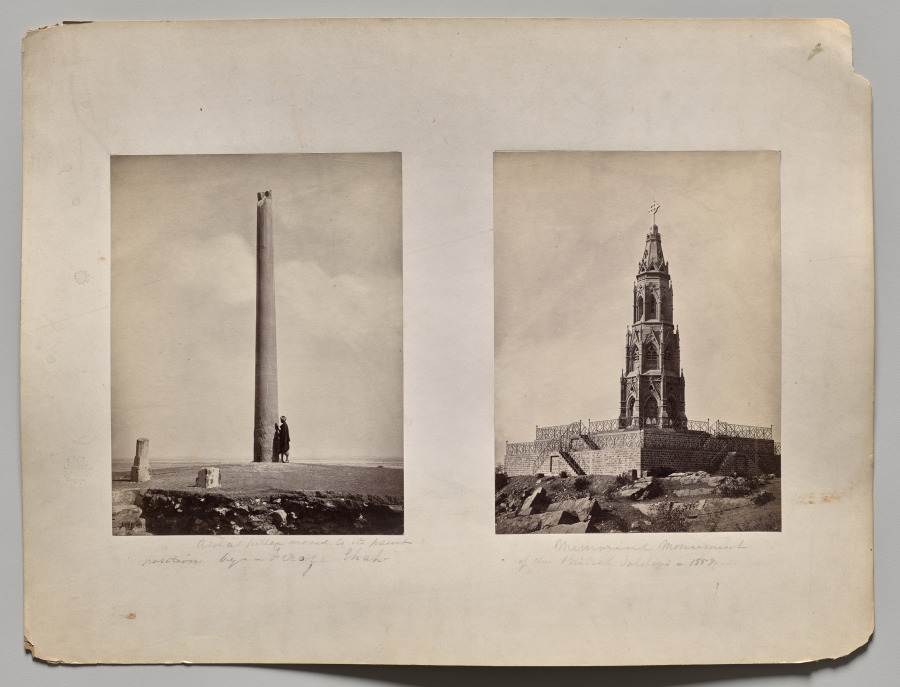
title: Left: [Ashoka Pillar moved to its present position by Feroz Shah]. Right: Memorial Monument of the British Soldiers in 1859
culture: England, 19th century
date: 1870s-1880s (?)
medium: 2 albumen prints mounted on an album page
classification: Photograph